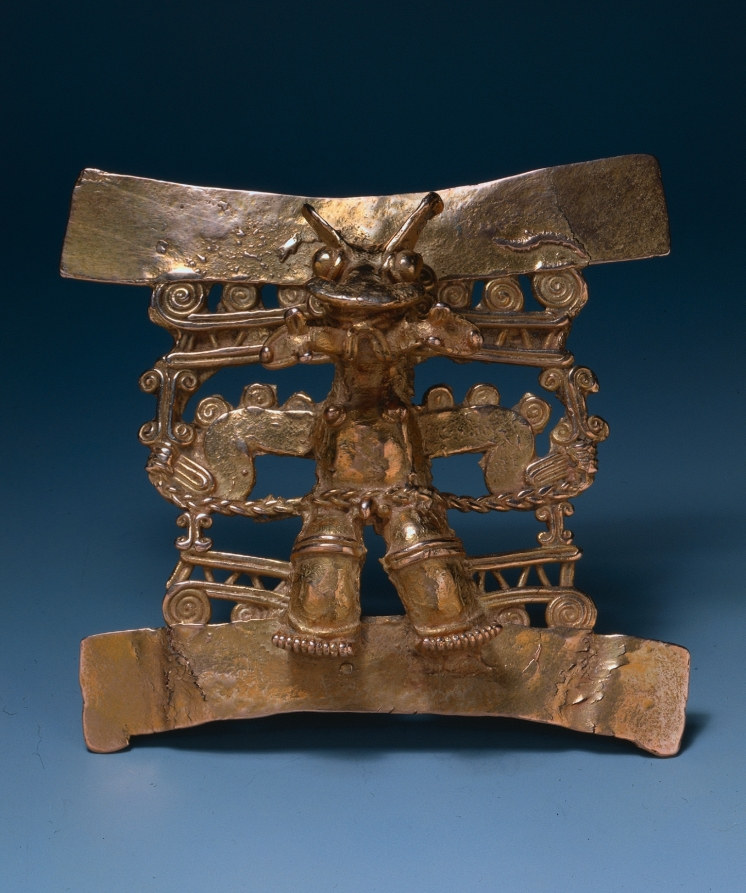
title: Animal-Headed Figure Pendant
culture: Costa Rica, Diquís region, 11th-16th century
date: c. 1000–1550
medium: cast gold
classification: Metalwork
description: Among the pendants shown here are a crustacean (1943.290), an animal-headed figure (1948.18), and two pendants featuring birds (1951.442 and 1946.223). The latter were dubbed aguilas (eagles) by Christopher Columbus, who saw natives wearing them as necklace ornaments. Modern researchers are not as sure of the species shown, but some believe that they are birds of prey because talons and beaks are prominent and often clutch something, in one example here a small, disembodied head that holds a clapper. In both examples, two tufts in the form of crocodiles in profile flank the birds’ heads.